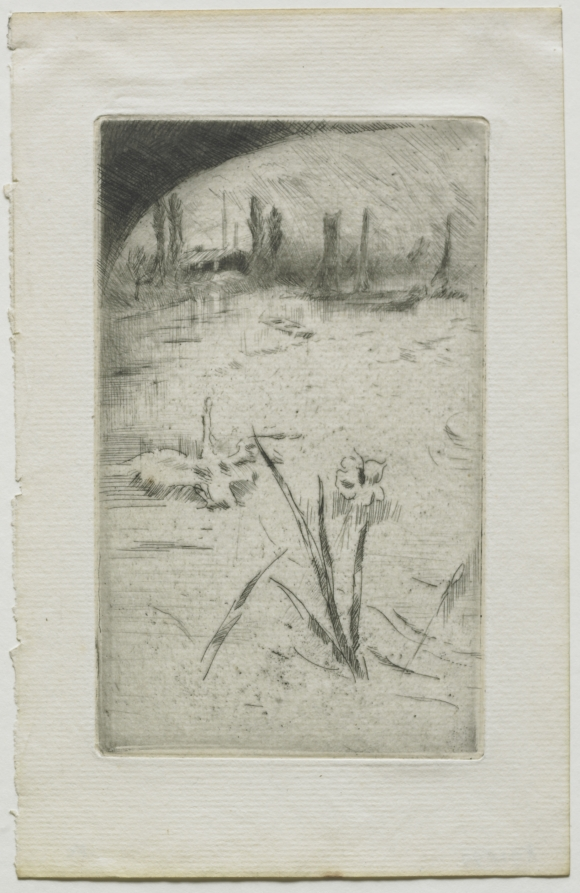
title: Swan and Iris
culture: America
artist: James McNeill Whistler (American, 1834–1903)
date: 1883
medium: etching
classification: Print